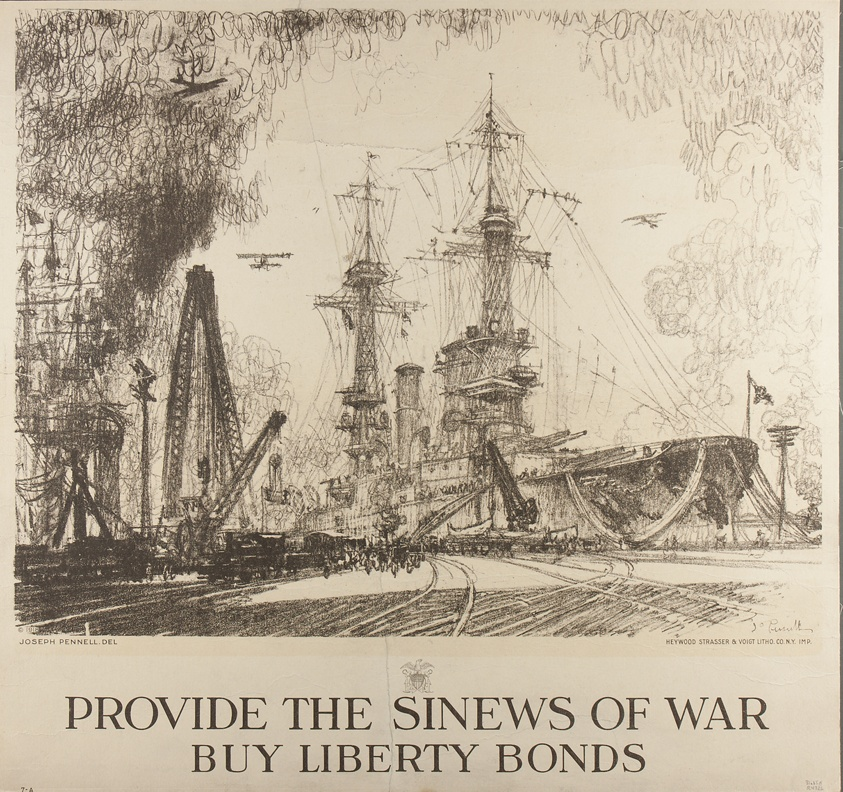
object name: Print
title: Provide the Sinews of War, Buy Liberty Bonds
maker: Joseph Pennell (American, 1857-1926); printed by Heywood, Strasser & Voigt Litho. Co., New York, New York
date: published 1918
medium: Lithograph on cream wove paper laid down on linen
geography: United States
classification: lithograph; print; prints and drawing